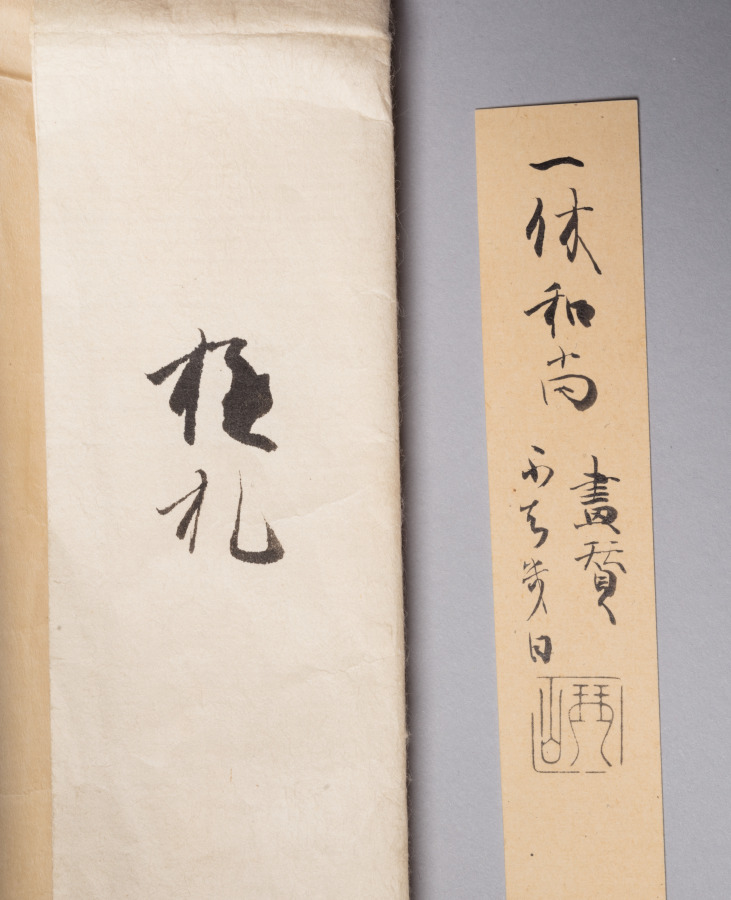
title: Calligraphy with Willow and Swallows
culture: Japan, Muromachi period (1392–1573)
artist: Ikkyū Sōjun (Japanese, 1394–1481)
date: 1400s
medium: hanging scroll, ink on paper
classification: Painting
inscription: How many days has it rid itself of the crow’s cloth? It knows not!/ Lovely is its body so nimble and neat./ Neither men of wealth, courtly position, or power can come close to the unfettered, noble swallow!/ With the coming of spring, it seems to be flying about, dancing around the grass hut of the foolish Priest. signed: Unkasō Isshi Tōkai jun Ikkyū shi ga ippitsu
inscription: outer box inscribed: Ikkyū Ōshō Enshi-zu Jigasan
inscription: inner box side lid inscribed: Showa 50 (1975), November by Tayama Honan with kao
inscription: Inner box side lid inscribed: Ikkyū Ōshō Bokuseki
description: The famed Buddhist monk Ikkyū is best remembered for his calligraphy. Calligraphic conventions of his time called for brushwork that did not vary much in style from character to character. However, as Ikkyū’s lines progress, his brushwork wanders between standard script and a sort of shorthand, marked by an uneven distribution of ink and a reduction of the characters to only the most necessary strokes. Ikkyū’s direct communication of emotion via brushwork became characteristic of the works produced by monks affiliated with the temple Daitokuji later in the Edo period (1615–1868).